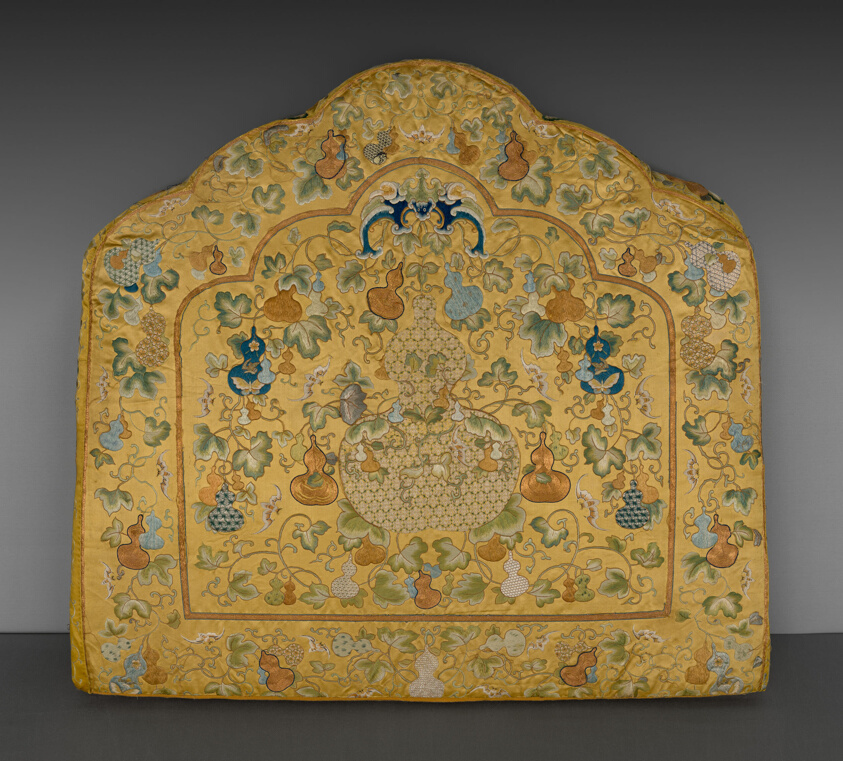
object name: Textile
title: Cushion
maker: China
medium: Silk, satin weave, embroidered with silk and gold-leaf-over-lacquered-paper-strip wrapped silk in back, Chinese knot, herringbone, satin, single satin, split, and stem stitches; laidwork and couching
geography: China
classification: textile; needlework (visual works)